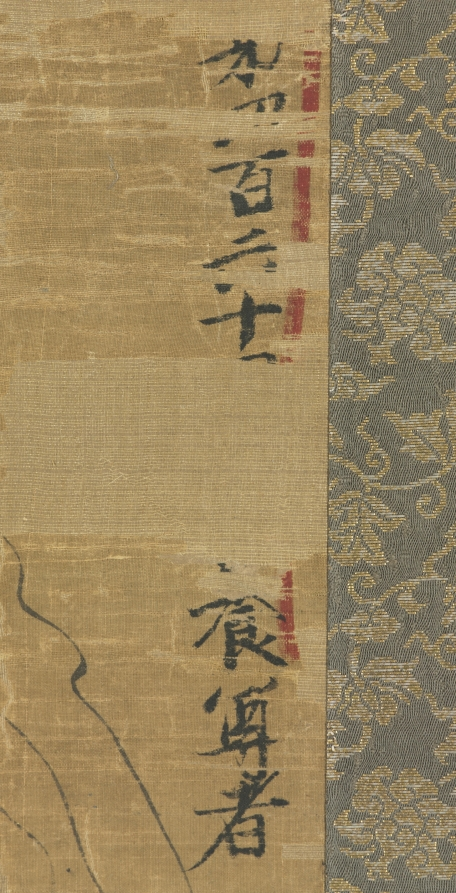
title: Arhat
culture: Korea, Goryeo dynasty (918–1392)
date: 1235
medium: Hanging scroll; ink and slight color on silk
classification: Painting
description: An arhat (Nahan in Korean), an advanced disciple of the Buddha, is represented here in profile with a halo encircling his head. This particular arhat is Segongyang jonja, numbered as the 464th of 500 arhats. He sits on a woven bamboo stool, is luring a dragon into an alms bowl. This hanging scroll is one of only about ten known works that survive today, all of which (except for Cleveland’s piece) are currently preserved in Korea or Japan.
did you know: This painting that depicts an arhat, a human being who has achieved enlightenment, used to be part of a set of 500 hanging scrolls.